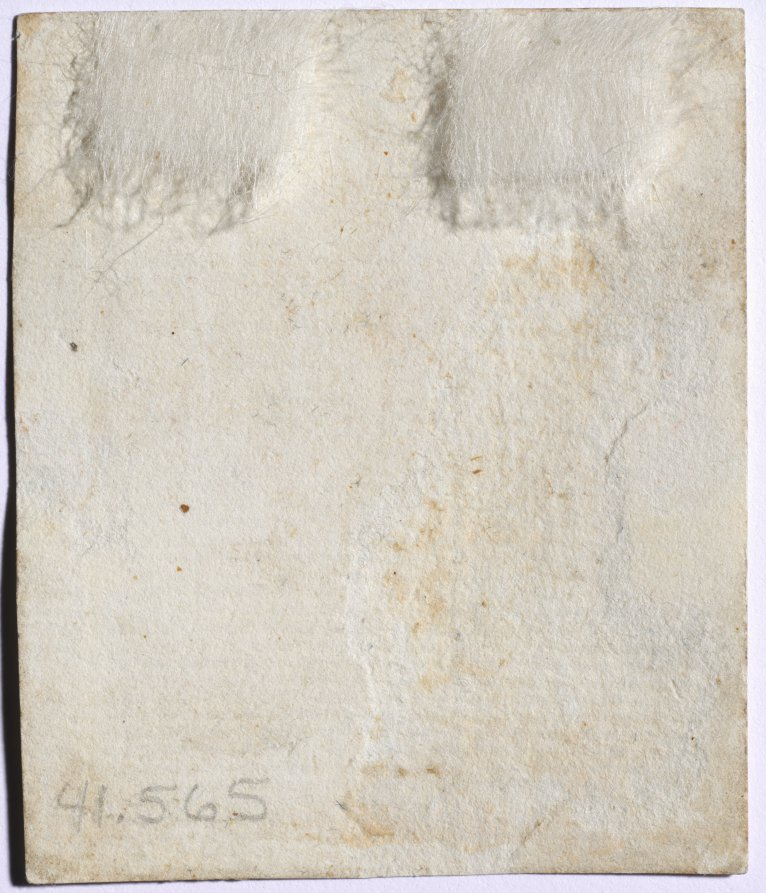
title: Portrait of a Woman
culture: England, 18th century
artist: John I Smart (British, 1741–1811)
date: c. 1776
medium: graphite and wash on laid paper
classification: Portrait Miniature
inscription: inscribed on front of paper at upper right corner: 119 (or 115?); inscribed on paper backing, in graphite, upside down at lower left: 10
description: Although it is impossible to say if it was always part of the artist’s process to execute a preparatory sketch prior to painting each miniature, we do know that John Smart retained many hundreds of these sketches. A group of preparatory sketches—of which this portrait is one—descended through the Smirke family after Smart’s daughter Sarah gave a sketchbook containing preparatory portrait studies to her friend Mary Smirke, sister of the celebrated Victorian architect Sydney Smirke. This book was probably broken up around 1877 when it was divided between Sydney’s daughters Mary Jemmett and Mrs. Lange, whose portions were both sold at auction in 1928. Compared to his contemporaries George Engleheart (1752–1829) and Andrew Plimer (1763–1837), whose female sitters were often painted in similar simple white gowns, Smart often lavished more attention on the costumes in his portraits of women, whose dresses incorporated colored silks, printed fabrics, and luxury trimmings like lace and fur. The sitter’s head and shoulders face left. She has what was probably once blond hair—now faded to pink—dressed high on her head, with curls down the back of her neck, over which a veil descends. Her eyes are hazel, and the color of her lips has almost completely faded. Positioned in an oval, and revealing much of her left breast, she wears a low-necked dress with faint traces of pink pigment, trimmed with a string of pearls. The background is unpainted. To this date, the finished ivory for which this preparatory sketch was presumably undertaken has not been discovered. The portrait was assigned the historically colorful but fictitious title of “Henrietta Maria” at some point after memory of its true identity had been lost. Giving illustrious titles to portraits of unknown sitters was a popular strategy adopted by dealers during the nineteenth and twentieth centuries, often applied to miniature portraits and, in particular, to Smart’s sketches of women. In 1948 Arthur Jaffé wrote to the Cleveland Museum of Art that a “Mrs. Samuelson of Exeter recently brought me two frames, with six sketches mounted in each, of ladies, mostly with fancy names. I think there is no doubt that they were part of Mrs. Lange’s share of the Smirke sketches, though unlike yours they did not pass through Christie’s auction in Dec. 1928. I persuaded Mrs. Samuelson to let me remove them from their frames and to rub the paper backing from the card on which the sketches are painted. The result was as follows. Included was a No. 115 called, Margaret, Archduchess of Austria, which is the same number given to our Henrietta Maria.” Elsewhere Jaffé notes that the number on the front of this sketch was probably a 119 instead of a 115.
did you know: Sketches helped John Smart work out the particulars of a portrait before commencing the miniature on ivory; they were useful in the event that a duplicate might later be required.